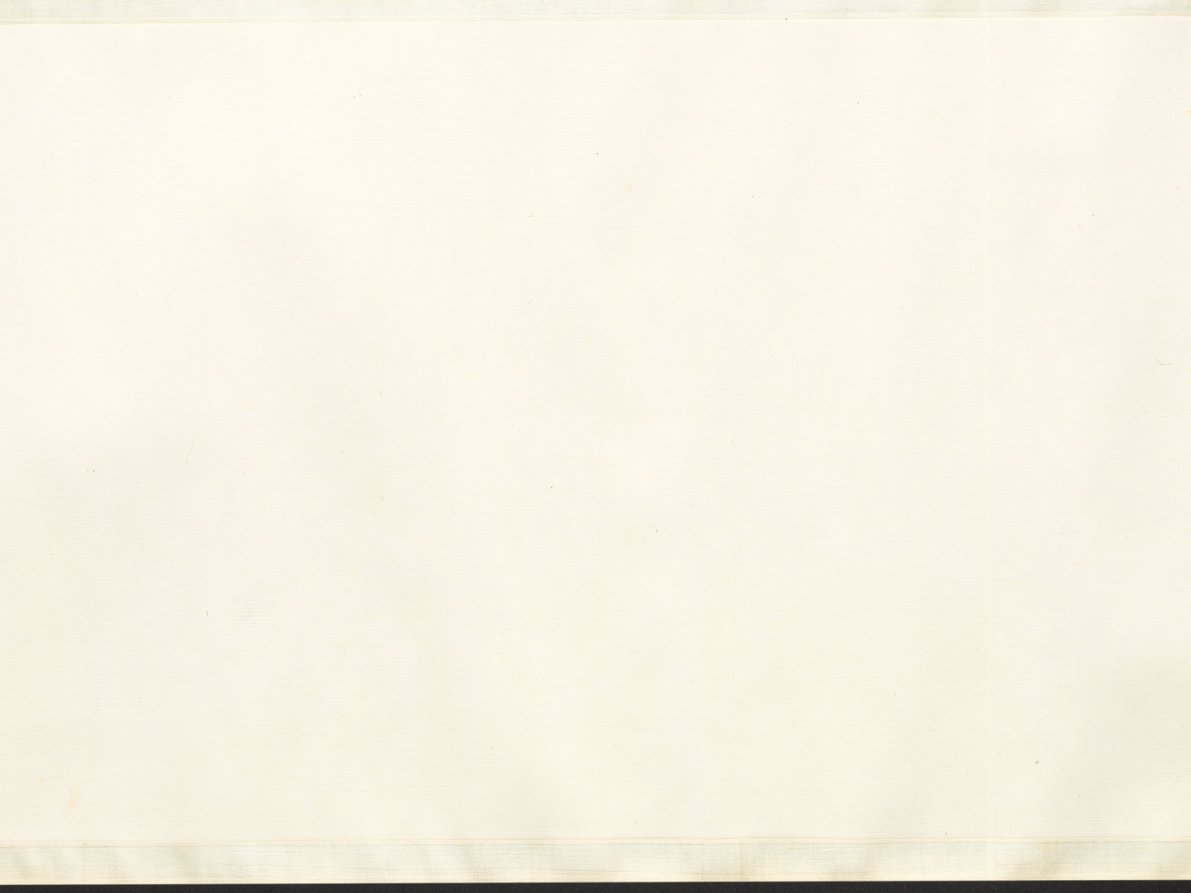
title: Fisherman's Joy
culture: China, Ming dynasty (1368–1644)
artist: Qian Gu (Chinese, 1508–c. 1578)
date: 1572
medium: Handscroll; ink and light color on paper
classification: Painting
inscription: Artist's inscription, signature, and seal: On the autumn day of the jen-shen year [1572], P'eng-ch'eng, Ch'ien Ku painted [this]. [seal] Hsüan-ch'ing shih. 2 colophons, both dated 1689, and 5 additional seals of Yün Shou-p'ing (1633-1690).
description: This painting has a scene showing two small crafts, each manned by two fishermen, practicing a traditional fishing method. In one of them, a man uses a bamboo pole to direct the movements of a cormorant bird sent into the water. Cormorant fishing, witnessed in some areas of the lower Yangzi River, appears in Zhe school paintings. Qian Gu may have borrowed these narrative figure scenes from Zhe school paintings, while his vantage point, brushwork, and soft tones align with the Wu school style. Scenes of fishermen appealed to urban and educated audiences who idealized the self-sufficient independence of fisherfolk.